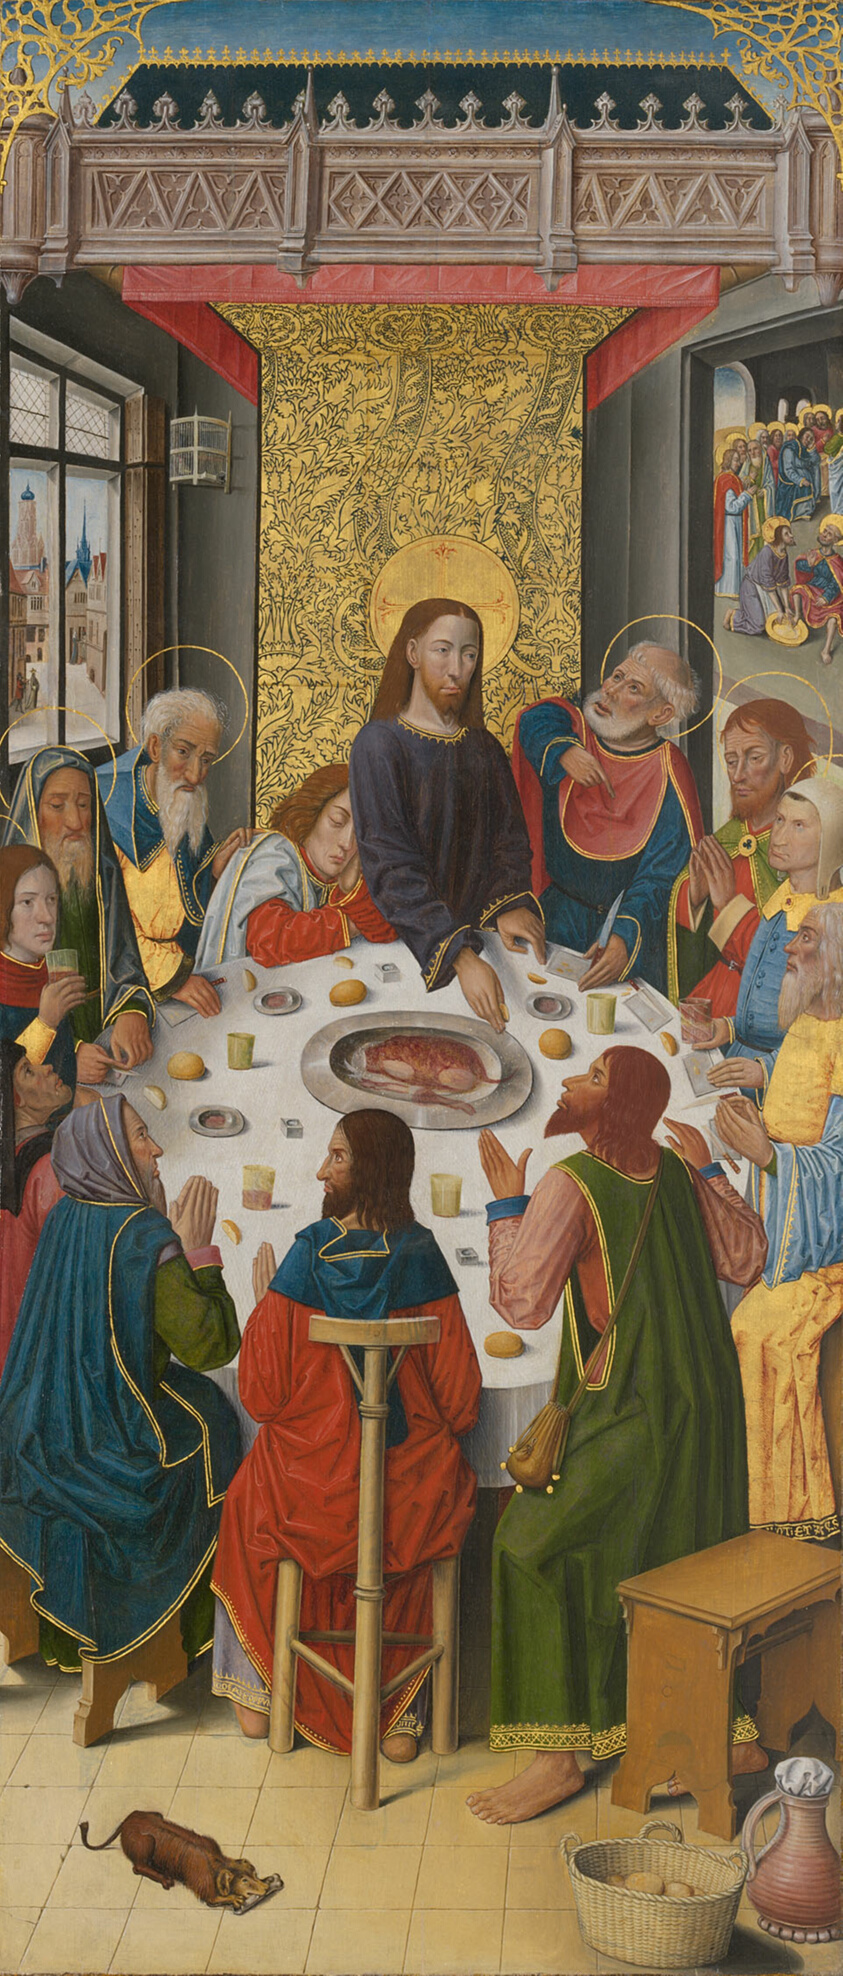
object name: Painting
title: Panels from the High Altar of the Charterhouse of Saint-Honoré, Thuison-les-Abbeville: The Last Supper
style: 15th century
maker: French; Picardy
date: c. 1495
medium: Oil on panel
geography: France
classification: oil on panel; france; french; oil paintings (visual works); paint; painting; european painting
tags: Century of Progress, France, French, architecture, architecture, architechture, jug, basket, dog, towns, chair, table, figures, men, food, saints, interior, Christianity, Christian subjects, Jesus, religious figures, religious scenes, religious, religion, biblical, altar, world's fairs, Chicago World's Fairs